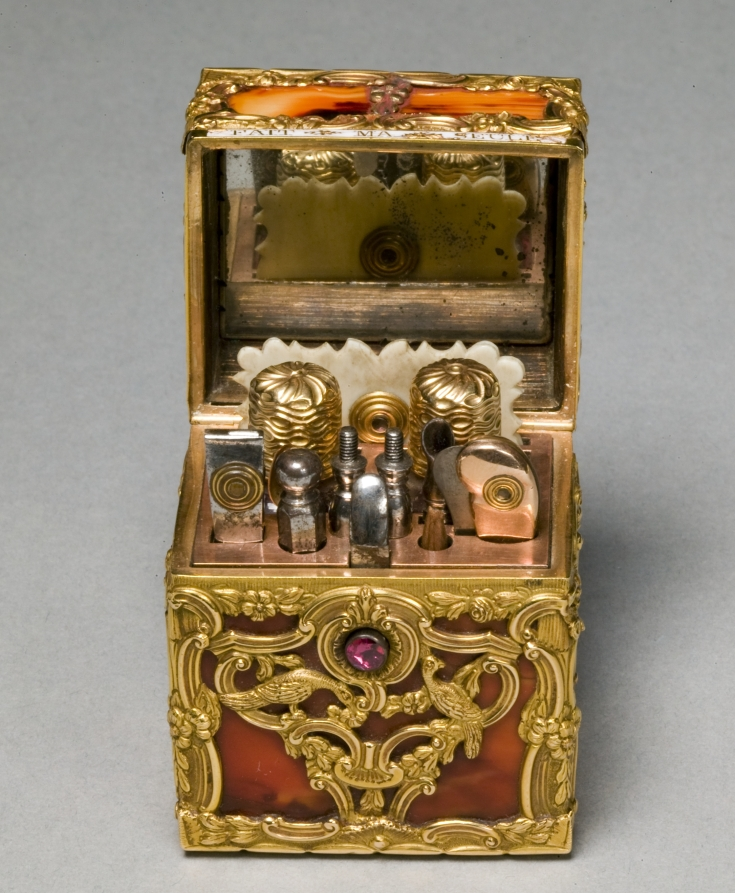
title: Vanity Case (Nécessaire)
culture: England, mid 18th century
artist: attributed to James Barbot (British)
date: c. 1760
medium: gold, orange agate, enamel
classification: Miscellaneous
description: Luxurious personal objects were an essential part of a privileged wardrobe during the 1700s and early 1800s, emphasizing their owner’s refinement and wealth. Jewelry, miniatures, and nécessaires—small expensive sets designed to hold grooming, writing, and sewing tools—were often given as intimate gifts, intended to be seen and admired. Their glittering surfaces, however, disguised a system based on the labor and suffering of enslaved or indentured people, whether in gold and stone mines or shops where these goods were made.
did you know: This small box with a mirror-lined lid is a dressing table accessory that contains luxury objects such a clasp knife, snuff spoon, ivory tablet, and scent bottles.